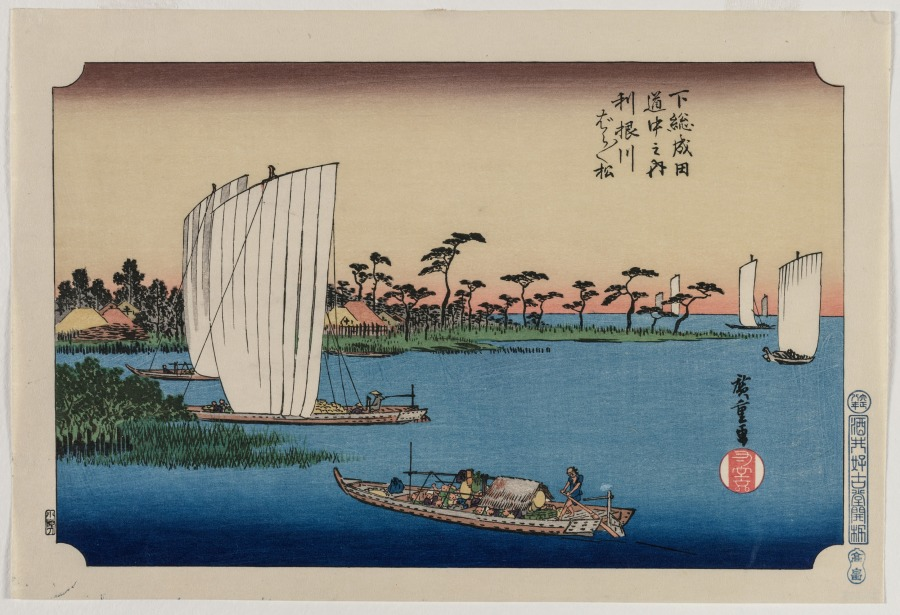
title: Scattered Pine Trees by the Tone River, from the series The Road to Narita in Shimosa Province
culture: Japan, Taishō period (1912–26)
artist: Utagawa Hiroshige (Japanese, 1797–1858)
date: published in 1919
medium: color woodblock print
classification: Print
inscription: Signature: Hiroshige ga Artist Seal: Ichiryusai Publisher: Sakai Kokodo kaihan